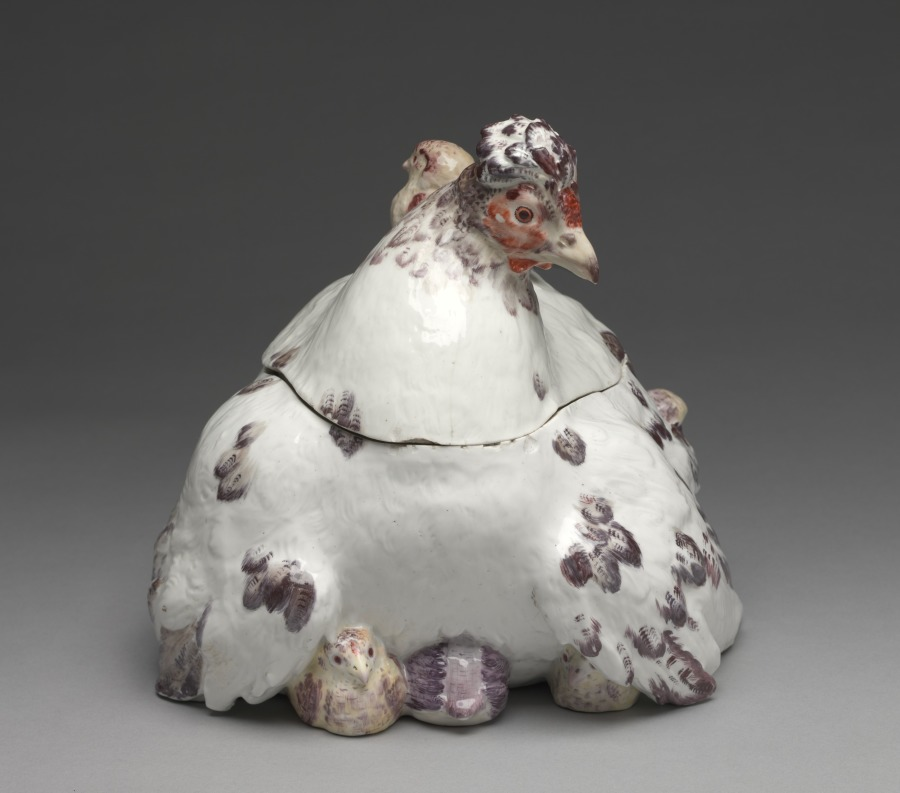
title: Hen and Chicks Covered Tureen on Stand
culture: England, London, Chelsea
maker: Chelsea Porcelain Factory (Britain, London, 1745–84)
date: c. 1755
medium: soft-paste porcelain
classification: Ceramic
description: The ceramic factory at Chelsea, located along the river Thames in western London, was Britain’s most renowned factory of decorative porcelain in the mid-1700s. Large tureens in the form of chickens or rabbits appealed to wealthy aristocrats, who took great care in developing specimen animal and poultry breeds on their country estates. The design for this particular tureen was taken from a popular seventeenth-century print by Francis Barlow depicting a farmyard.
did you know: Though the form of a soup tureen suggests a functional role at the dining table, such large, expensive porcelains were probably only used for decoration because hot liquids might have easily caused them to crack.